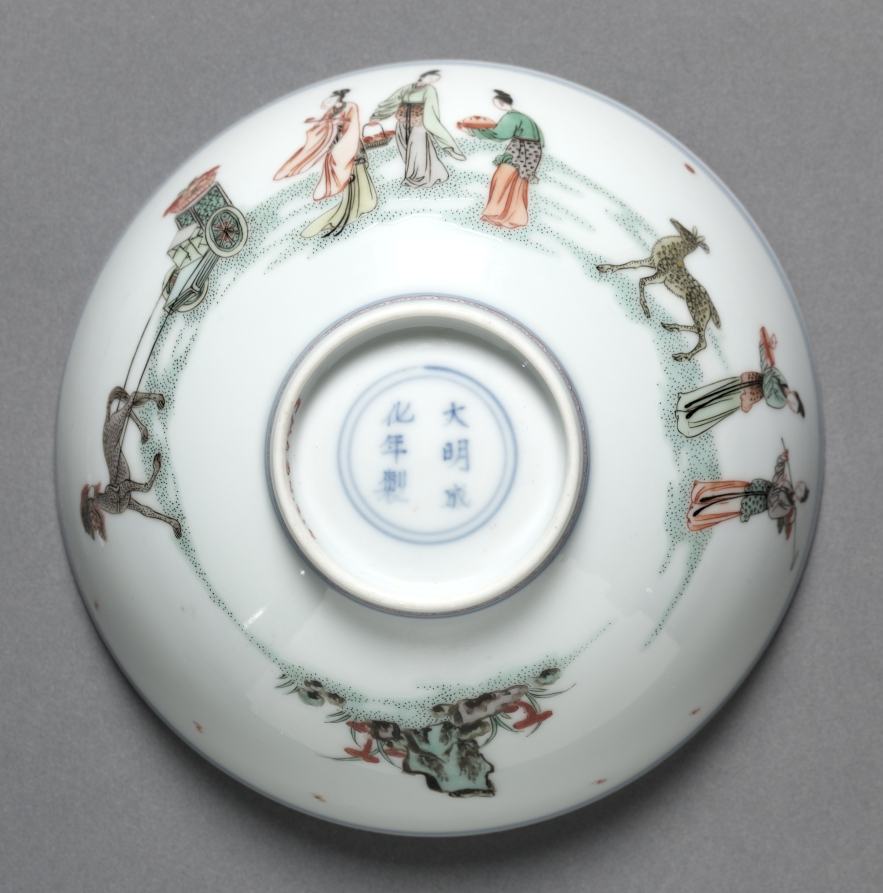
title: Bowl with Xiwangmu and Attendants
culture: China, Jiangxi province, Jingdezhen, Qing dynasty (1644-1911), Kangxi reign (1662-1722), but Chenghua mark (1465-87)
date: 1662–1722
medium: porcelain with famille verte overglaze enamel decoration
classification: Ceramic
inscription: 大明成化年製